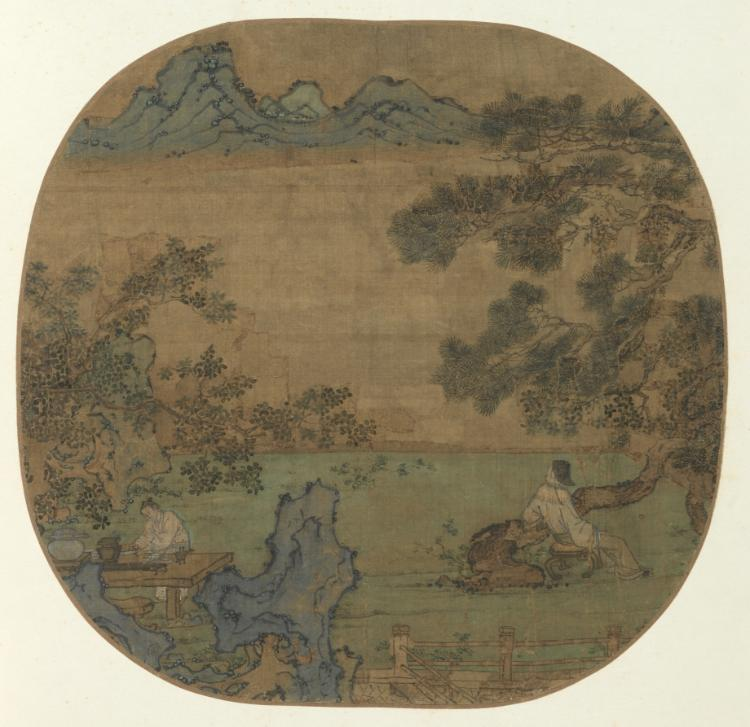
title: Landscape with Poet Tao Yuanming (365–472 CE)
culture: China, Ming dynasty (1368-1644) or earlier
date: 1200s–1400s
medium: Album leaf; ink and color on silk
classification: Painting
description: Poet Tao Yuanming (365–427 CE) turned down a civil service career in politically turbulent times to write poetry and enjoy his garden. In his poem Drinking Wine, he wrote: "I pluck chrysanthemums under the eastern fence, and serenely I gaze at the southern mountains." His desire to leave bureaucratic life for the simplicity and authenticity of nature has deeply resonated with generations of Chinese scholars, making it a popular theme in paintings.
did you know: The archaic vessels and qin, or seven-stringed zither, on the table allude to the gentleman-scholar’s cultural refinement.